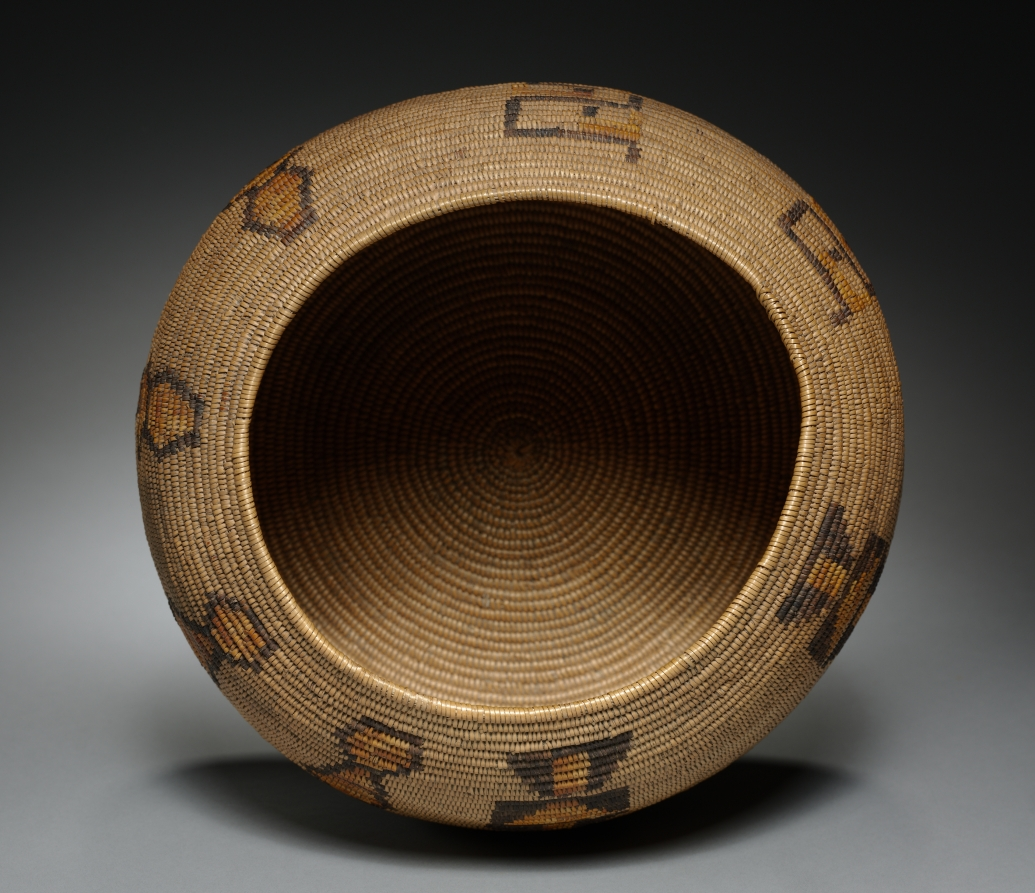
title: Gift Basket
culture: California, Cahuilla (Mission, Saboba Mission), Unassigned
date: c. 1900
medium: Juncus, sumac; coiled, deergrass bundle foundation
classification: Basketry